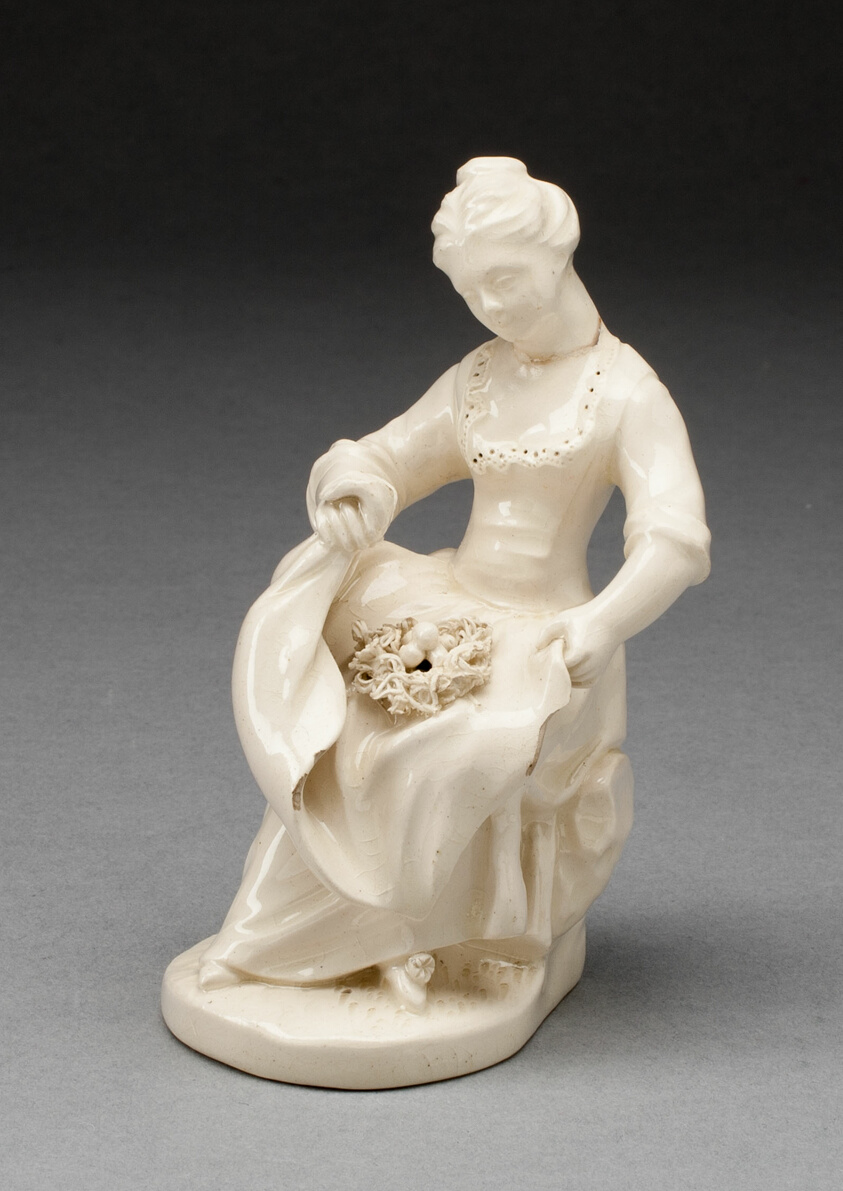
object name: Ceramics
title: Girl with Bird Nest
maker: Italy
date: c. 1775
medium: Lead-glazed earthenware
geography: Italy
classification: tin-glazed ware; ceramics; earthenware; european decorative arts